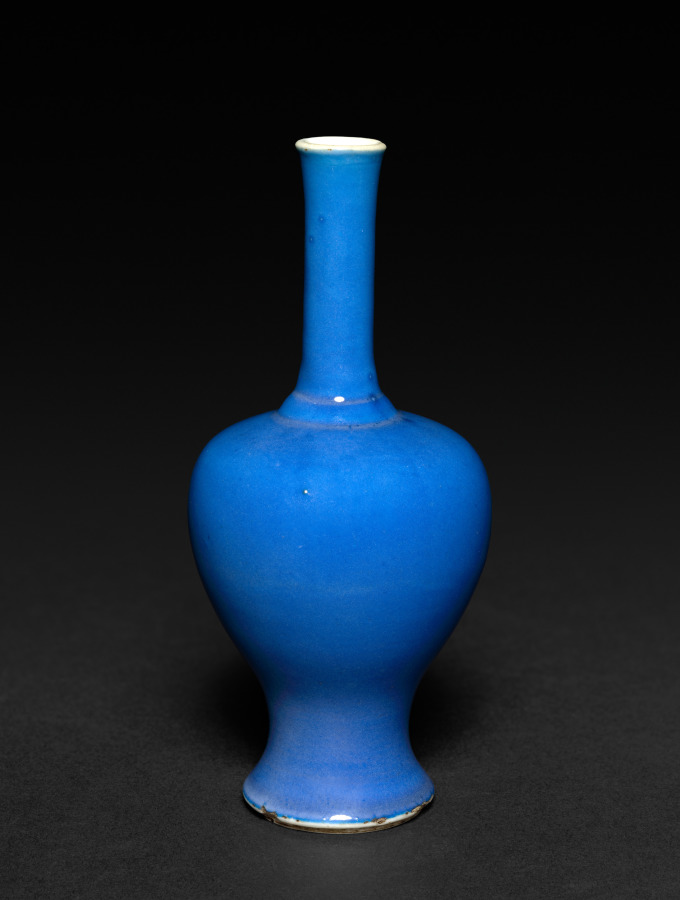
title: Miniature Vase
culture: China, Qing dynasty (1644-1911), Kangxi reign (1662-1722)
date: 1662–1722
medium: porcelain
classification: Ceramic